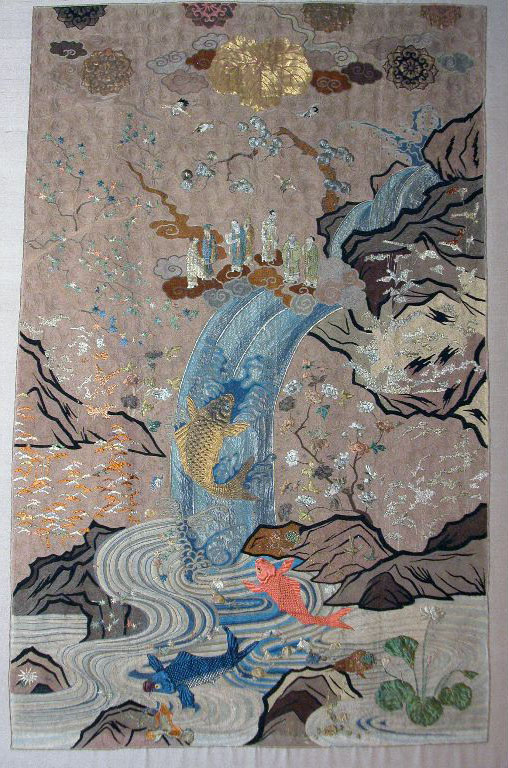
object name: Textile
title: Panel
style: Japanism, meiji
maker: Japan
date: 1894, Meiji period (1868–1912)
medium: Silk, satin weave; underlaid with pieced cotton, plain weaves; some printed; covered with paper; embroidered with wild silk and silk, silk-wrapped cotton, gold-leaf-over-lacquered-paper strip and gold-leaf-over-lacquered-paper-strip-wrapped cotton and silk in single satin, satin, stem, and paper padded satin and stem stitches; laid work, couching and padded couching; painted details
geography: Japan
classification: textile; needlework (visual works)